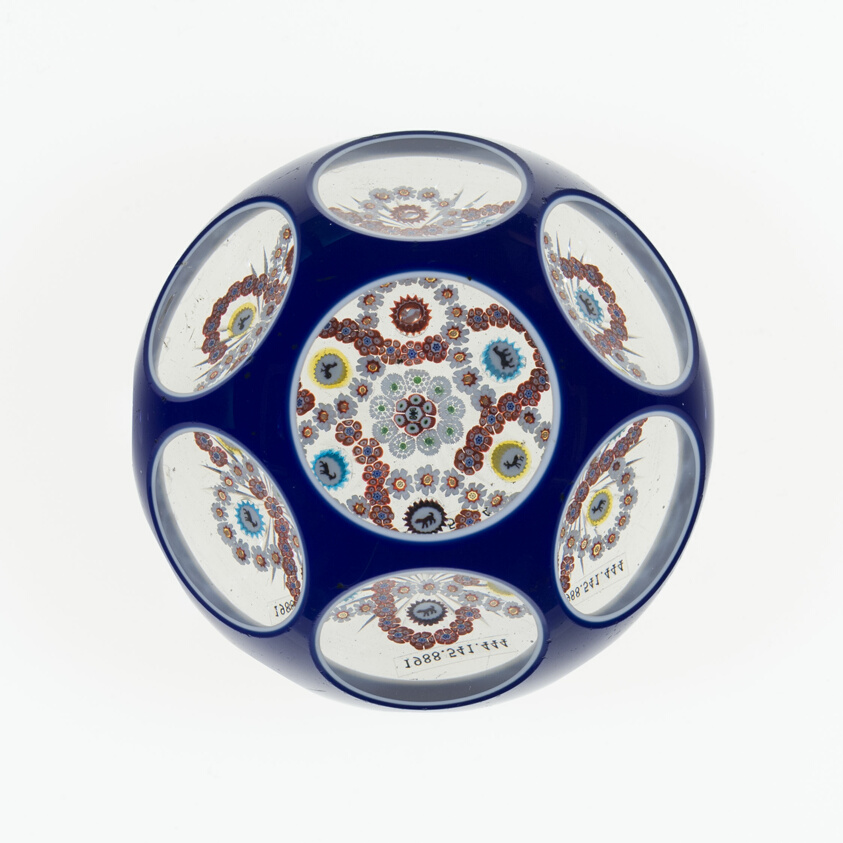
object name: Glass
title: Paperweight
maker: Baccarat Glassworks (Cristalleries de Baccarat); Lorraine, France, founded 1764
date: c. 1845–60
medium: Glass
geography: Baccarat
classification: paperweight; glass